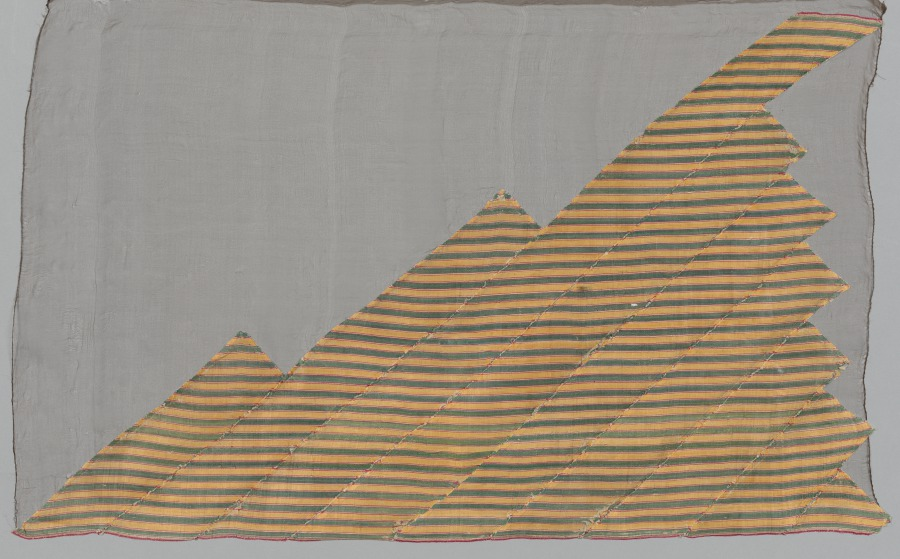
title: Fragment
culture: India, 17th-18th century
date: 1600s - 1700s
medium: satin weave; silk and cotton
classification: Textile